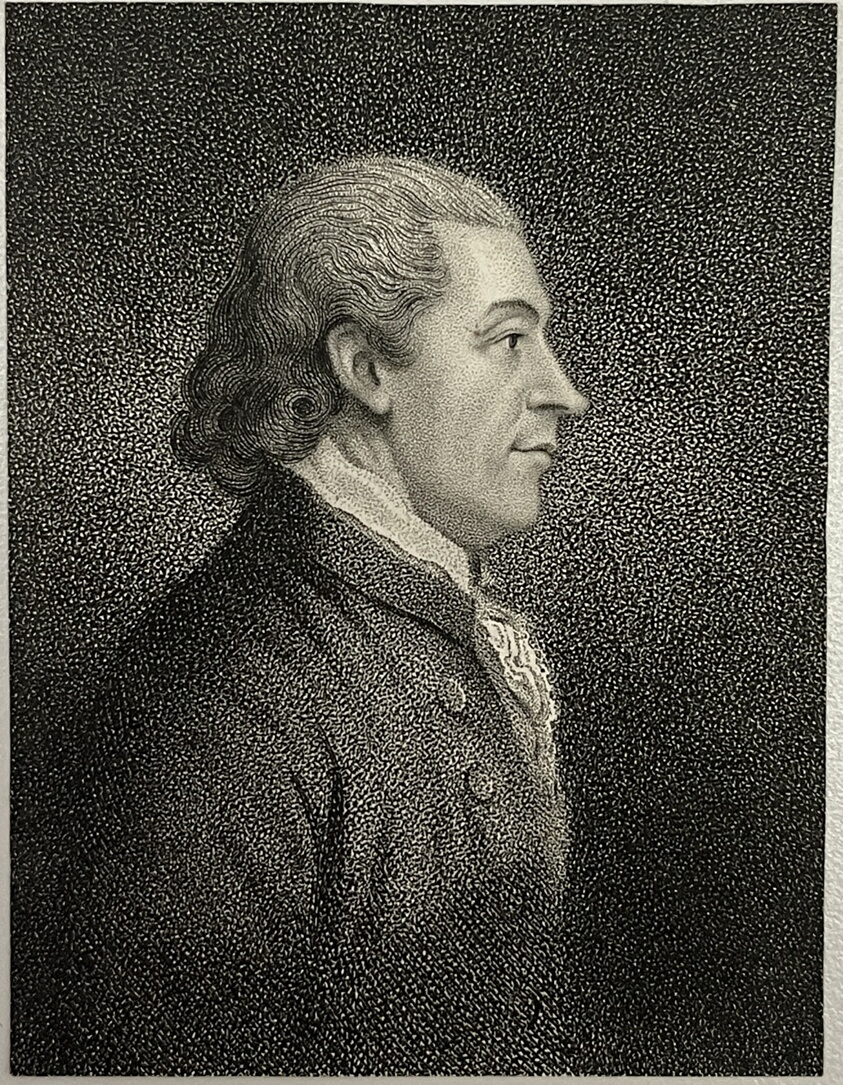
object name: Print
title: Portrait of man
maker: Artist Unknown (Likely American or British, 19th century)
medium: Stipple and line etching on paper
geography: United States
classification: reproduction; print; prints and drawing